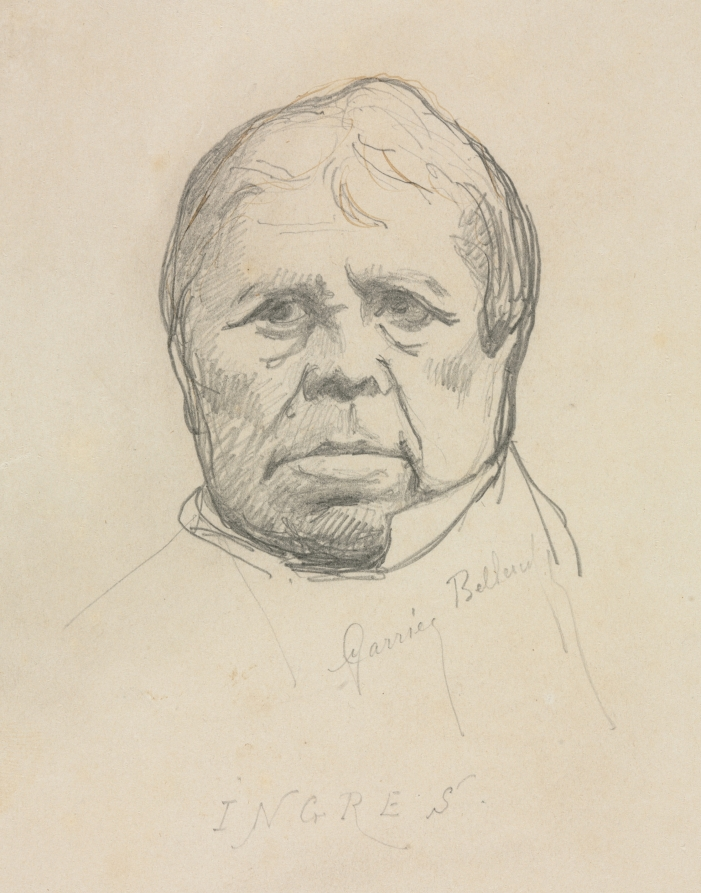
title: Portrait of Ingres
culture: France, 19th century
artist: Albert-Ernest Carrier-Belleuse (French, 1824–1887)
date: c. 1840–67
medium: graphite with brown ink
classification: Drawing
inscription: Signed in body of drawing, l.r. in graphite: Carrier-Belleuse; inscribed in graphite, lower center: Ingres; upper right corner, in graphite: 135 x 155